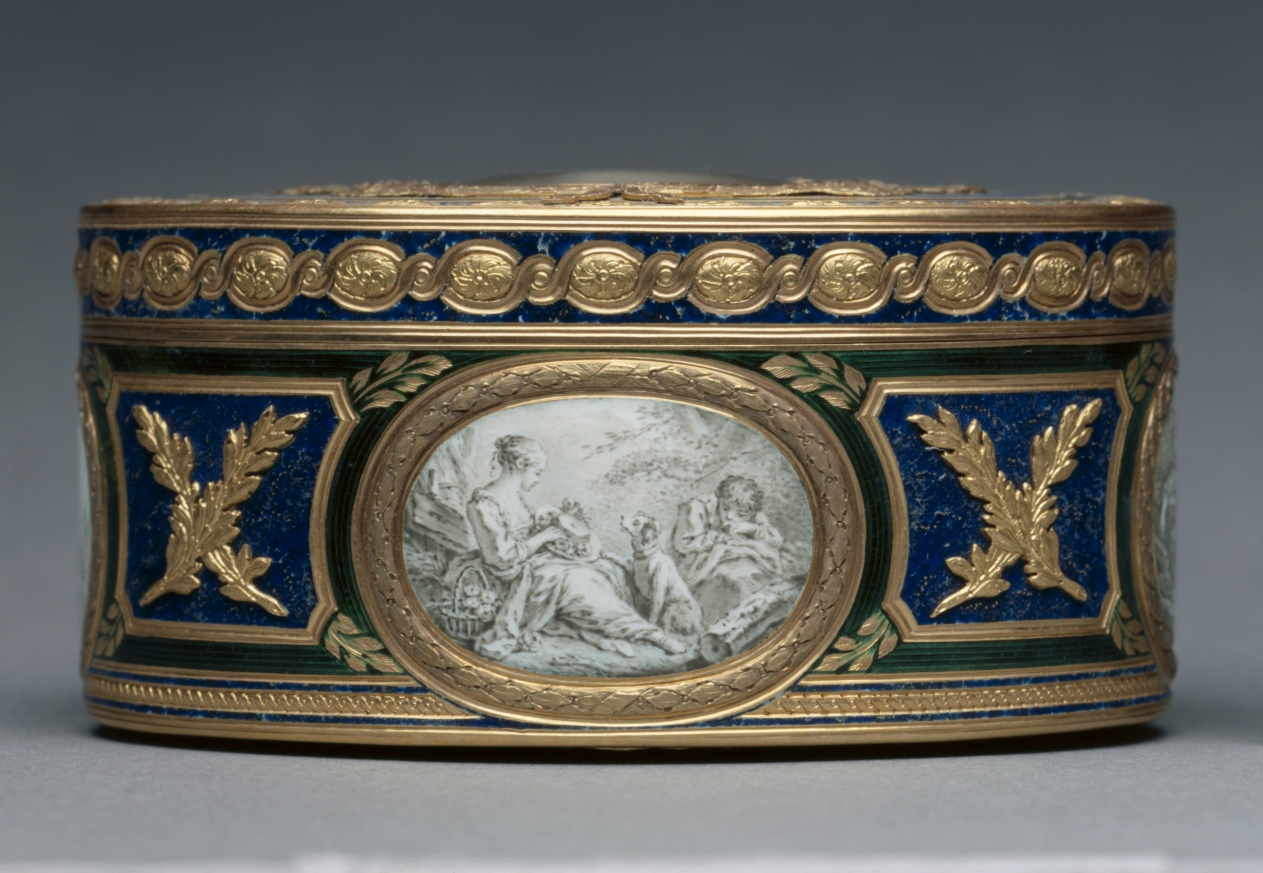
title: Snuff Box (Tabatière) with Portrait of Marie Antoinette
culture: France, 18th century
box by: Pierre-François-Mathis de Beaulieu (French)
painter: François Dumont (French, 1751–1831)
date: 1768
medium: watercolor on ivory in a gold and enamel box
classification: Enamel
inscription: [Maker's mark of Pierre-François-Mathis de Beaulieu, master goldsmith in 1768, inside cover]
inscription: [Charge mark of Jean-Jacques Prévot, 1762-1768, inside cover]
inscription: [Warden's mark of Paris, 1768-1769, inside cover]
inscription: [Discharge mark of Julien Alaterre, Paris, 1768-1774, on neck at right]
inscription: [Inside box, the letter]: "F"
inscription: [On bezel at left, engraved number]: "627"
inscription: [On front of bezel, engraved signature]: "Ve Georges Beaulieu à Paris"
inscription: [On right of miniature portrait, the letter]: "D"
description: This box was created through the collaboration of two skilled and well-known artisans of the period, master goldsmith Pierre-François-Mathis de Beaulieu and celebrated miniature painter François Dumont. The portrait of Marie Antoinette on the box's lid is painted in Dumont’s own style while those on the sides and bottom of the box take inspiration from the work of painter François Boucher, known for his pastoral scenes in the Rococo style.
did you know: Marie Antoinette, queen consort of French King Louis XVI and great patron of the decorative arts, was executed in 1793 at the end of the French Revolution.